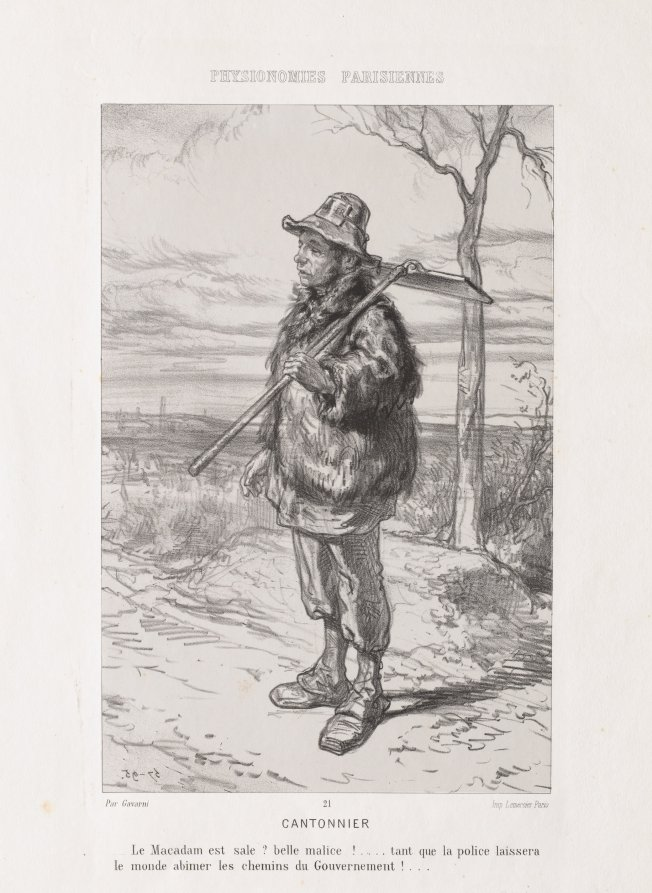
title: Street Sweeper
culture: France, 19th century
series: Parisian Physiognomy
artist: Paul Gavarni (French, 1804–1866)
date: c. 1857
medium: lithograph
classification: Print